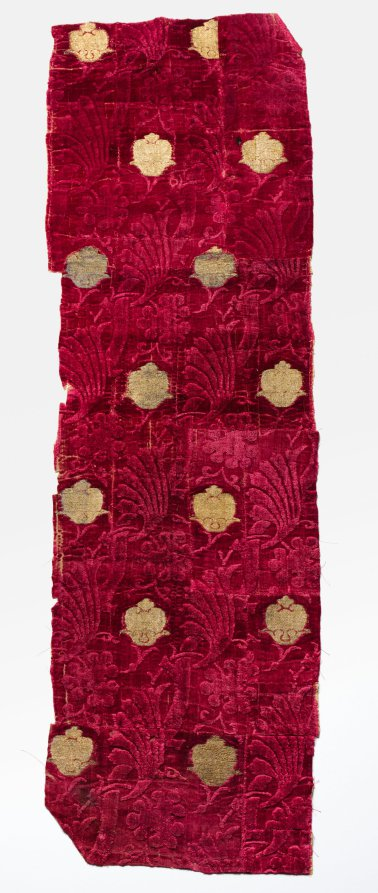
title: Velvet Fragment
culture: Italy, 15th century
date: 1400s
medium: velvet weave (cut with two heights of pile and brocaded): silk and gold thread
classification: Velvet